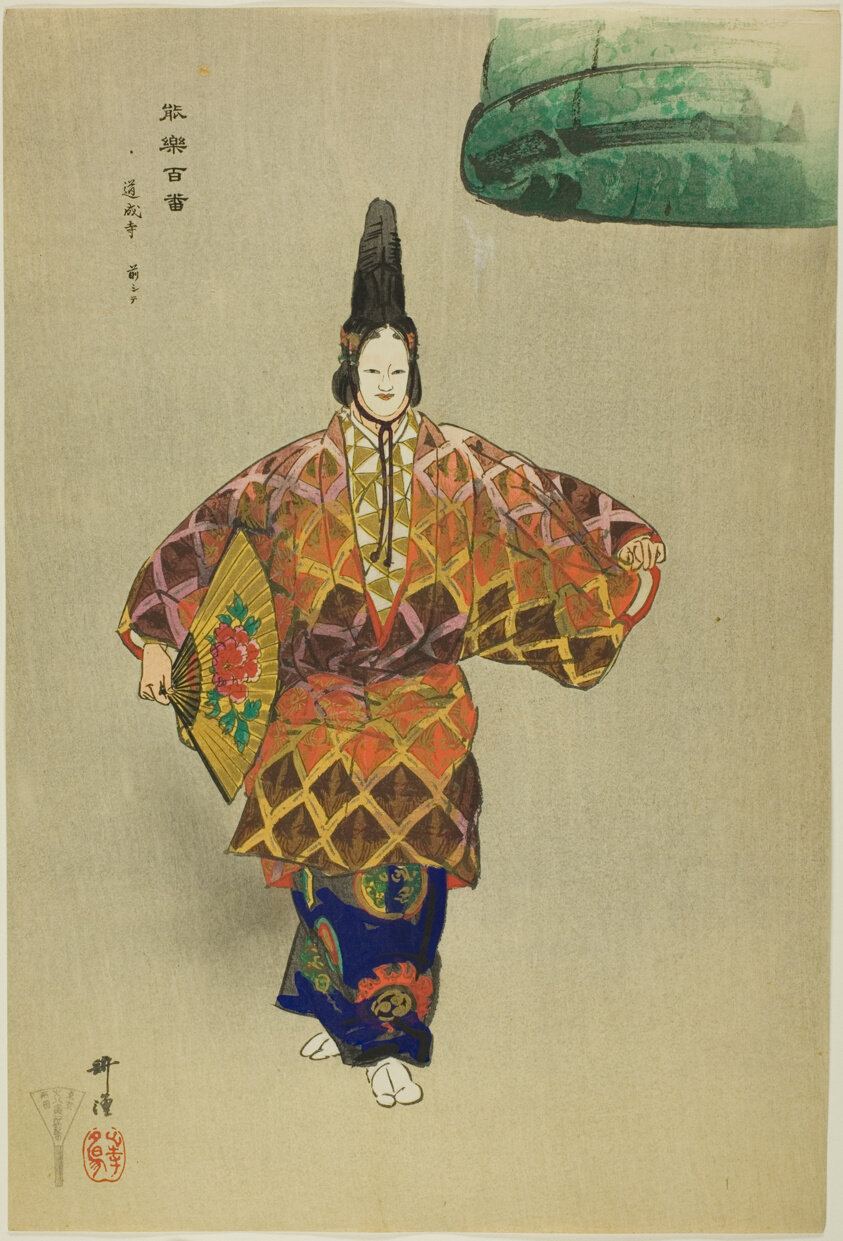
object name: Print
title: Dojoji, from the series "One Hundred No Dramas (Nogaku hyakuban)"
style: Japanese (culture or style)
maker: Tsukioka Kogyo; Japanese, 1869-1927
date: 1898/1903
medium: Color woodblock print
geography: Japan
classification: woodblock print; print; asian art